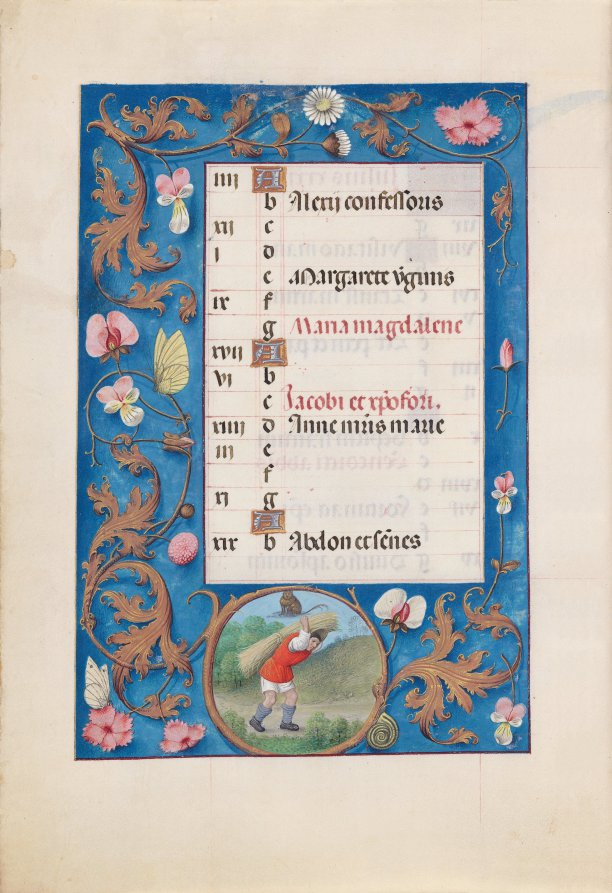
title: Hours of Queen Isabella the Catholic, Queen of Spain: Fol. 8v, July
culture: Flanders, Ghent and Bruges, late 15th century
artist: Master of the First Prayerbook of Maximillian (Flemish, c. 1444–1519)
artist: and Associates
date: c. 1500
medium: ink, tempera, and gold on vellum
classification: Bound Volume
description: A great lover of Flemish art, Queen Isabella treasured her many devotional books. This deluxe manuscript was created for her private devotions by highly organized and distinctly talented manuscript painters active in Ghent and Bruges. The Ghent-Bruges school represents the culmination of Flemish book painting, whose main features were the use of rich colors, illusionistic effects, a love of landscape, and a strong sense of visual narrative. Manuscripts produced by this circle of artists are renowned for their border decoration featuring a rich variety of realistically painted flowers, scrolling acanthus leaves, birds, and butterflies.